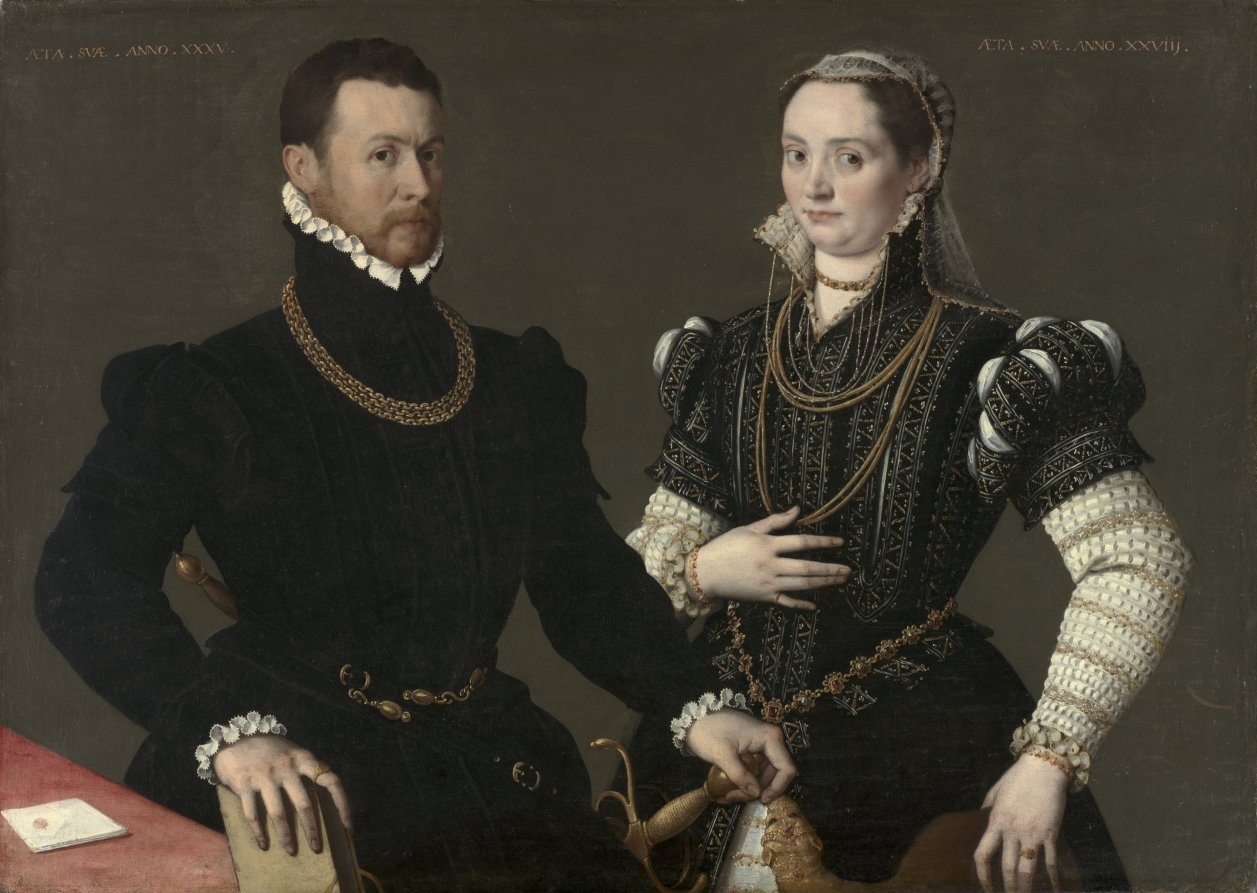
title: Portrait of a Couple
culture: Northern Italy, late 16th century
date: c. 1580–88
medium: oil on canvas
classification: Painting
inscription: inscribed upper left: AETA, SVAE, ANNO. XXXV, upper right: AETA. SVAE. ANNO. XXVIII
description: While the attribution remains hotly debated, this work exemplifies how Italian portraiture of the 1500s could articulate family alliances through marriage. The inscription gives the sitters’ ages as 35 and 28, and their elaborate jewelry, weapons, and garments, made of expensive materials, convey their elite status. The marten skin attached to the woman’s waist-its head decorated with gems-symbolized propriety. These expressions of wealth convey achievements and position rather than accurate personalities, and the figures, though lifelike, stand in awkward relationship to each other, their interaction one of alliance not love.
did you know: The bejeweled martin (weasel) was a coveted fashion accessory in Renaissance Europe.